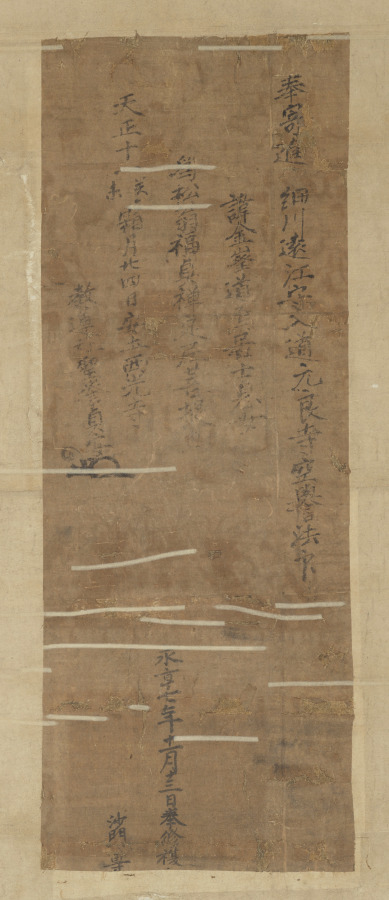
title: Taima Mandala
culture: Japan, Kamakura period (1185–1333)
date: early 1300s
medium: hanging scroll; ink, color, and gold on silk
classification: Painting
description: This painting is a copy after an 8th-century woven mandala belonging to the temple Taimadera. The composition is based on a sacred text that describes the Buddha Shakyamuni’s explanation of Amida’s Pure Land to Queen Vaidehi, as well as his instructions to her on visual meditation upon the Pure Land. The Pure Land appears at the center of the painting. To the left is the story of Queen Vaidehi’s encounter with Shakyamuni, and to the right are the scenes she is given to visualize. The bottom illustrates the nine levels of birth that can be attained in the Pure Land.